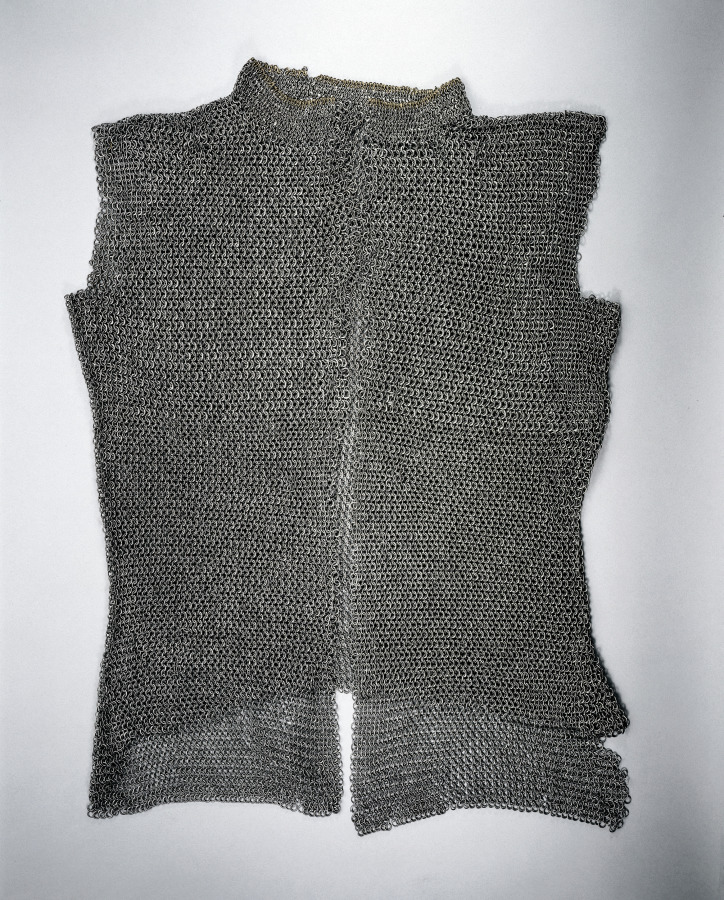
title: Hauberk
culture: European, 15th century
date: 1400s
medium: steel and brass rings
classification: Arms and Armor